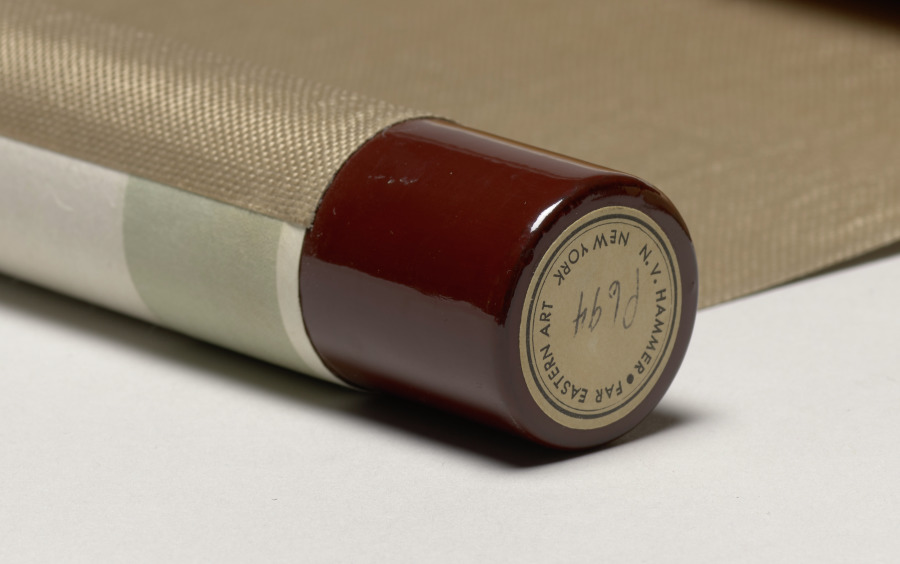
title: Portrait of Duli Xingyi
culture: Japan, Edo period (1615–1868)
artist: Kita Genki (Japanese, active c. 1664–98)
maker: Duli Xingyi (Chinese, 1596–1672)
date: 1671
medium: hanging scroll; ink and color on paper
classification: Painting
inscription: 1671 inscription at top of scroll by Duli Xingyi with three seals, 東矣䪩 (prefatory), 遺世獨立 (top) , 天外一閒人 (bottom); seal of Genki at lower left of painting 元規 .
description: In this portrait, the Ōbaku school Buddhist monk Duli Xingyi (born Tai Li, 1596–1672), whose name is pronounced Dokuryū Shōeki in Japanese, sits upon a woven mat holding a ceremonial scepter known as a ruyi, or nyoi in Japanese. Above his head is an insciption he added to the painting in 1671, the year before his death. It may be translated to read: Contemplative emptiness: the moon suspended over the village at midnight. Suddenly my soul is startled by the howl of an ape. Who could know that it would arouse me beyond my senses, and bring me an inner vision from Mt. Sumeru. (translated by Stephen Addiss and Kwan S. Wong) Originally from what is now the city of Hangzhou in China, Duli emigrated to Japan in 1653, where he took monastic vows. His skills in calligraphy and seal carving were formidable. Painter Kita Genki combined Chinese brush styles he learned in Nagasaki with Western painting techniques to capture Duli's likeness.